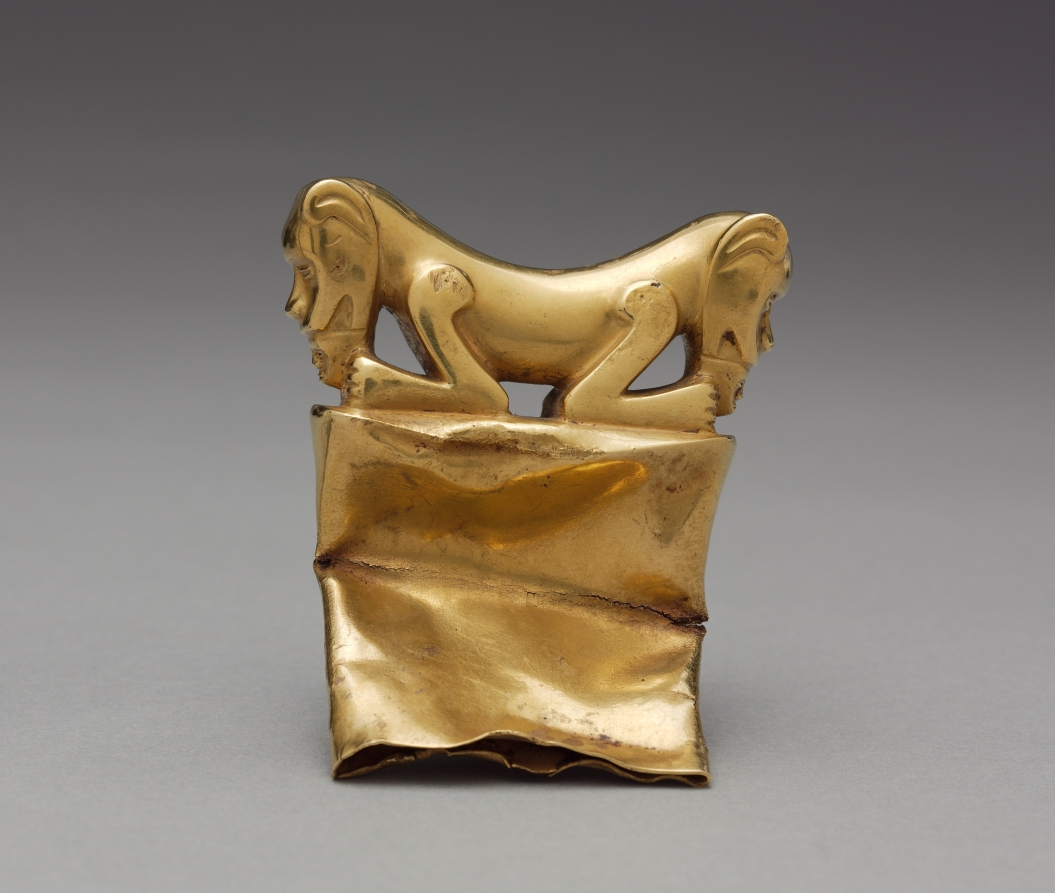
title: Staff Head(?)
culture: Colombia or Panama, International style, 5th-8th Century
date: c. 400–700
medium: cast gold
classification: Metalwork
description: The two-headed beast that crouches on the top of this object-perhaps a staff finial (head)-holds a human head or perhaps a mask between its paws. The silken surface and simple, elegant design identify the finial as of the International style, so-called because it crossed ancient boundaries and is found in Colombia as well as Costa Rica and Panama.